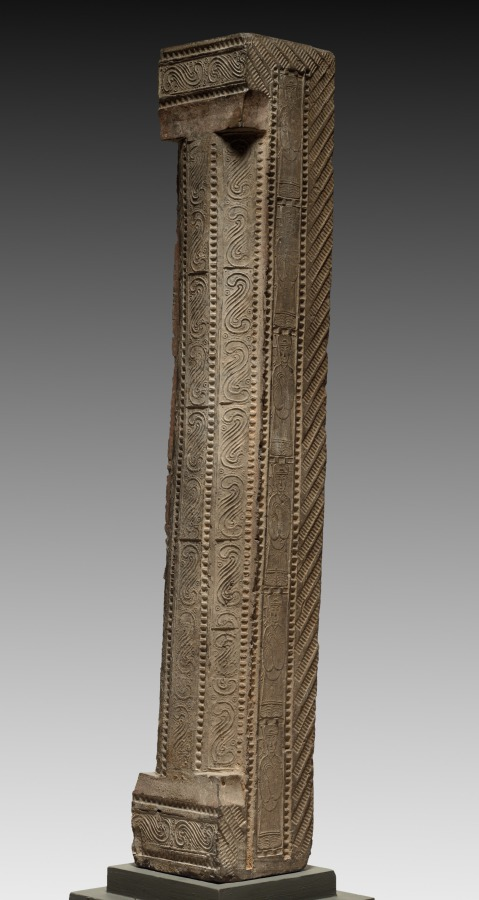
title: Hollow Tile: Column from Tomb-Chamber Doorway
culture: China, Han dynasty (202 BCE–220 CE)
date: 100–200 CE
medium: earthenware, die-stamped relief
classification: Ceramic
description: Striding tigers (top), racing horsemen (right column), and reverent officials (left column) are stamped into the surface of this underground portal to a tomb. The doorway preserves in stone the post-and-lintel structure, a basic element of Chinese wooden architecture. By the first century AD, a revolution in Chinese tomb construction and furnishing had taken place. Tombs lined with decorated bricks and tiles replace the earlier tombs constructed with only rammed earth-walls. Ceramic surrogates or models of stoves, houses, servants, and pets filled these more durable chambers, symbolically extending the creature comforts of this world into the world after death.